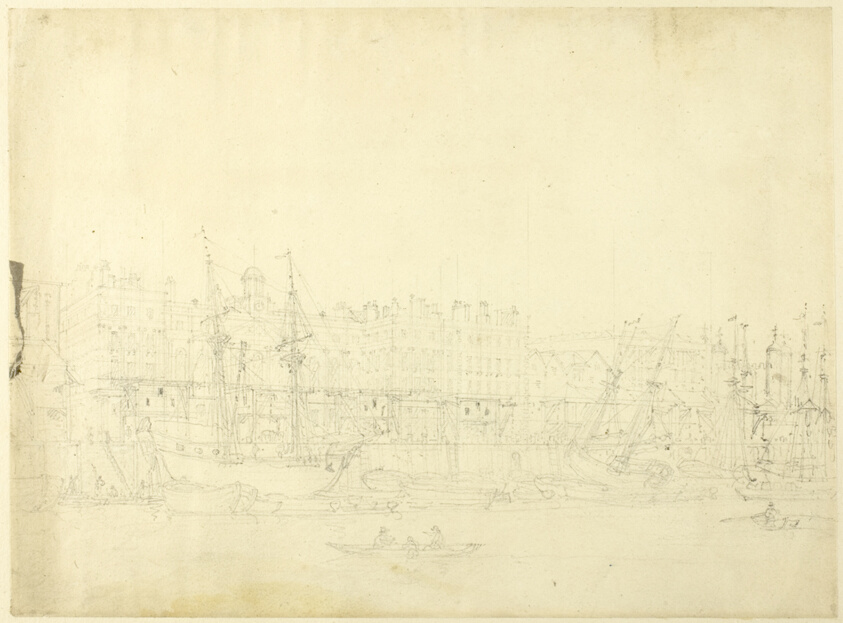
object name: Drawing and Watercolor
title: Study for Custom House, from the River Thames, from Microcosm of London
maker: Augustus Charles Pugin (English, born France, 1762-1832); Thomas Rowlandson (English, 1756-1827)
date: c. 1808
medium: Graphite on cream wove paper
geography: England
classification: graphite; drawings (visual works); prints and drawing